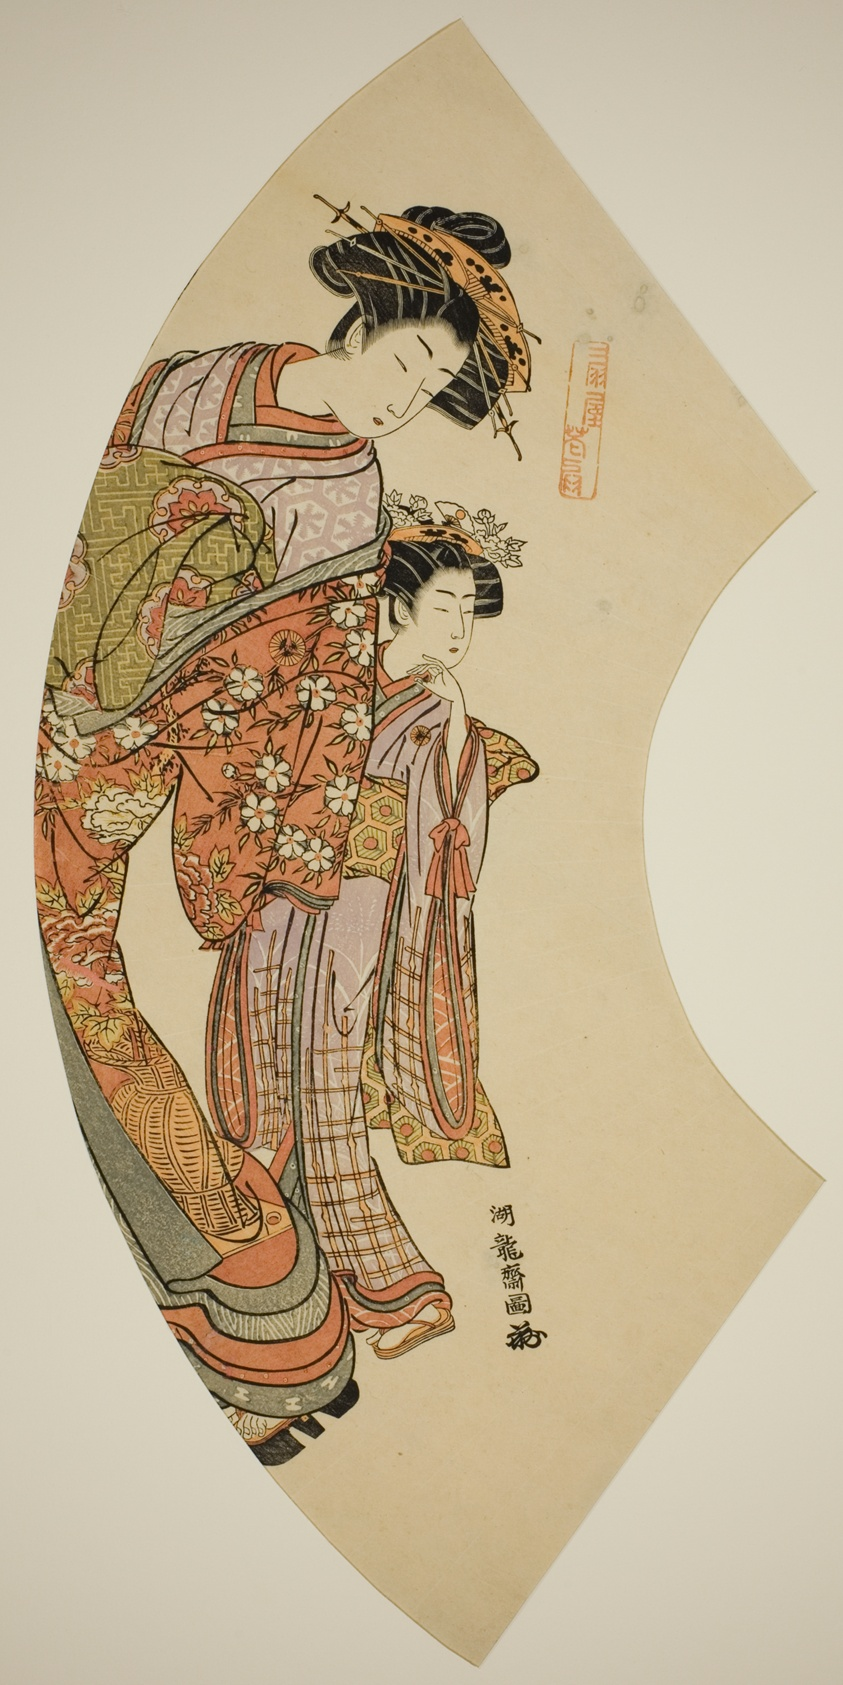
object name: Print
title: The Courtesan Hanaogi of the Ogiya and her attendant, from the series "Fans of the East (Azuma ogi)"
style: Japanese (culture or style)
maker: Isoda Koryusai (Japanese, 1735-1790)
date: c. 1777/78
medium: Color woodblock print; aibaiban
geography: Japan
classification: woodblock print; print; asian art